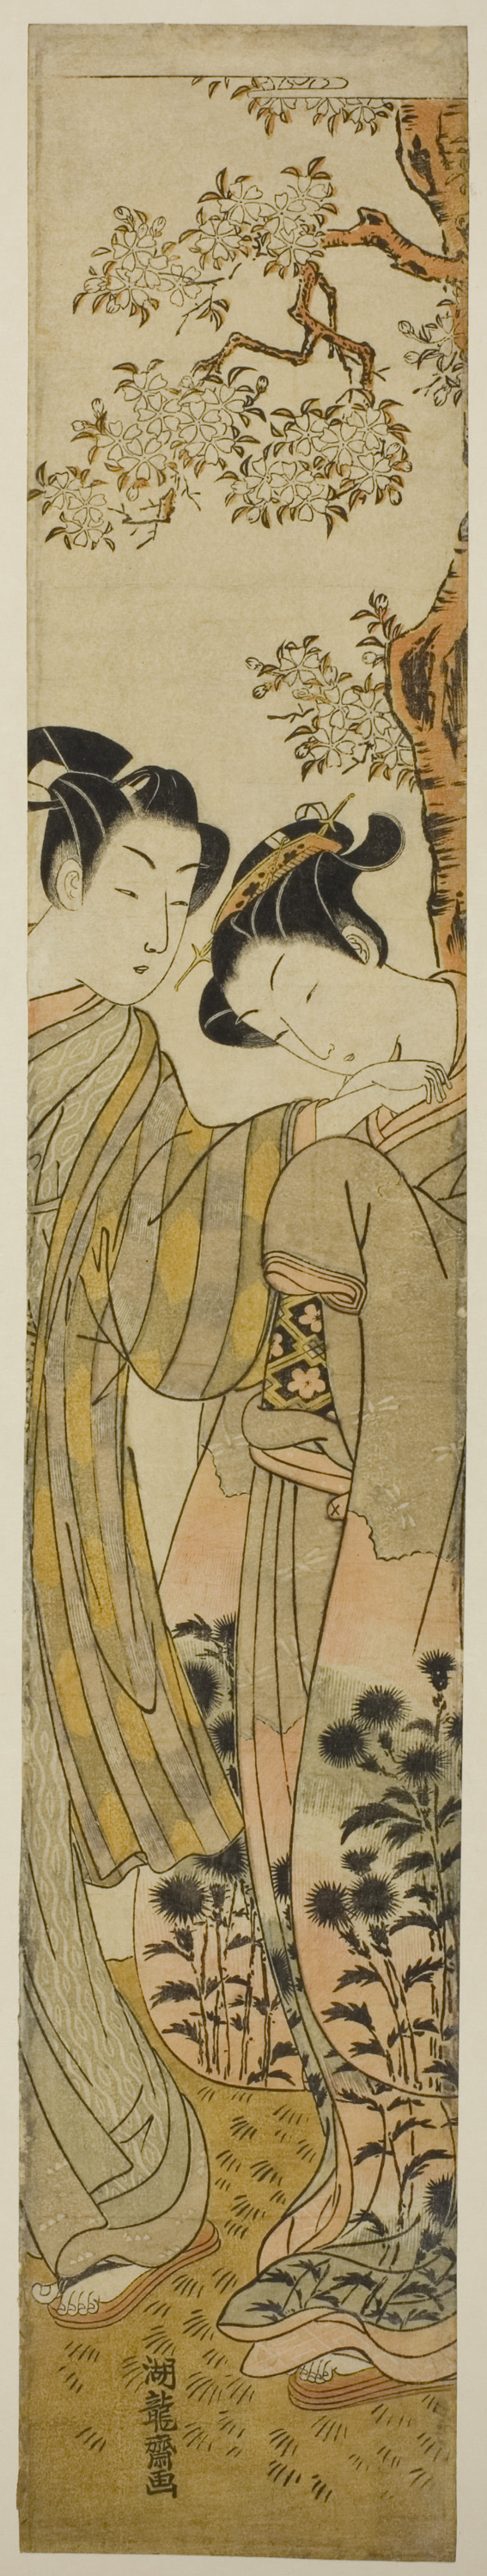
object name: Print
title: Lovers Under a Cherry Tree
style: Japanese (culture or style)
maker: Isoda Koryusai (Japanese, 1735-1790)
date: c. 1771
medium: Color woodblock print; hashira-e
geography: Japan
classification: woodblock print; print; asian art